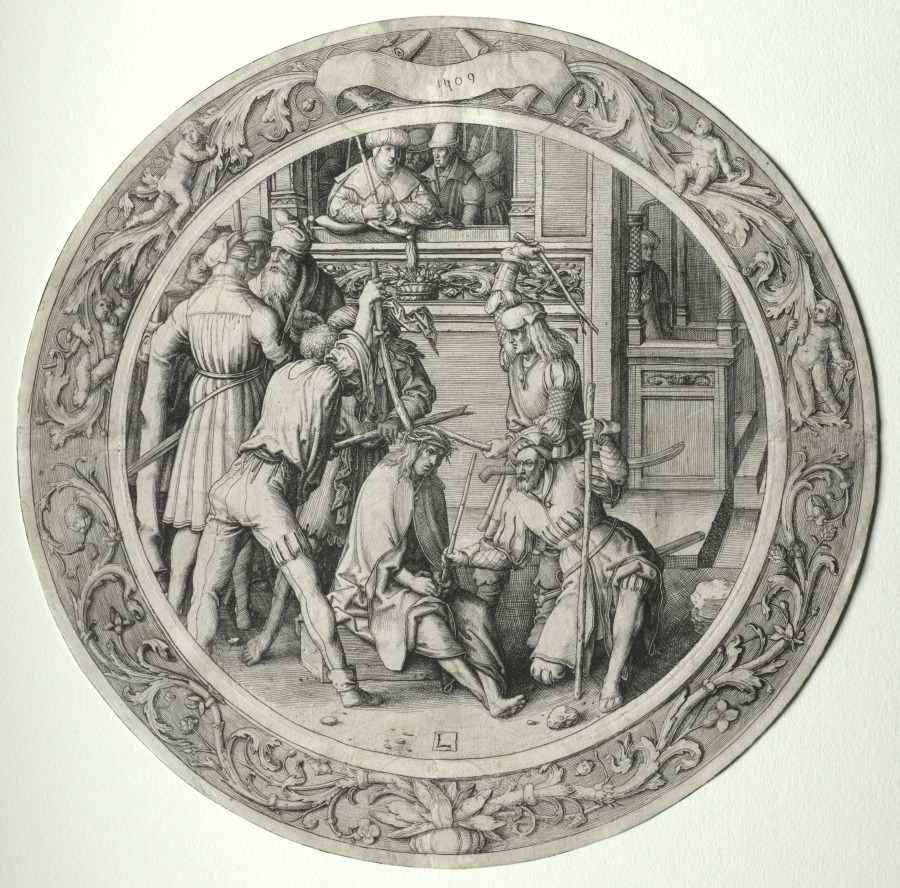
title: The Round Passion: Christ Crowned with Thorns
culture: Netherlands, 16th century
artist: Lucas van Leyden (Netherlandish, 1494–about 1533)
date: 1509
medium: engraving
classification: Print